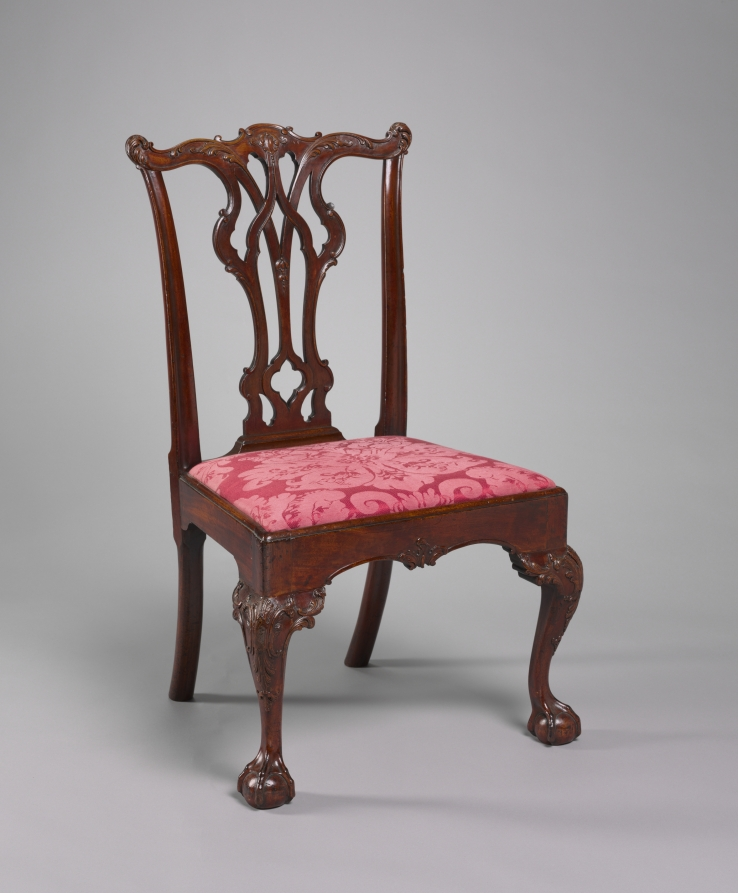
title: Side Chair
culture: America, Pennsylvania, Philadelphia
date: c. 1770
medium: mahogany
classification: Furniture and woodwork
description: The middle section, or splat, of this chair back, with its Gothic pointed arches, may be related to the style invented by the English cabinetmaker Thomas Chippendale. English chairs of this pattern are known, so the design probably originated there and was transmitted to this side of the Atlantic, perhaps by means of an imported example. This chair comes from a set made for Thomas and Elizabeth Edwards of Philadelphia, a furniture making center famous for its carved ornament. This chair features several finely and naturalistically carved details.